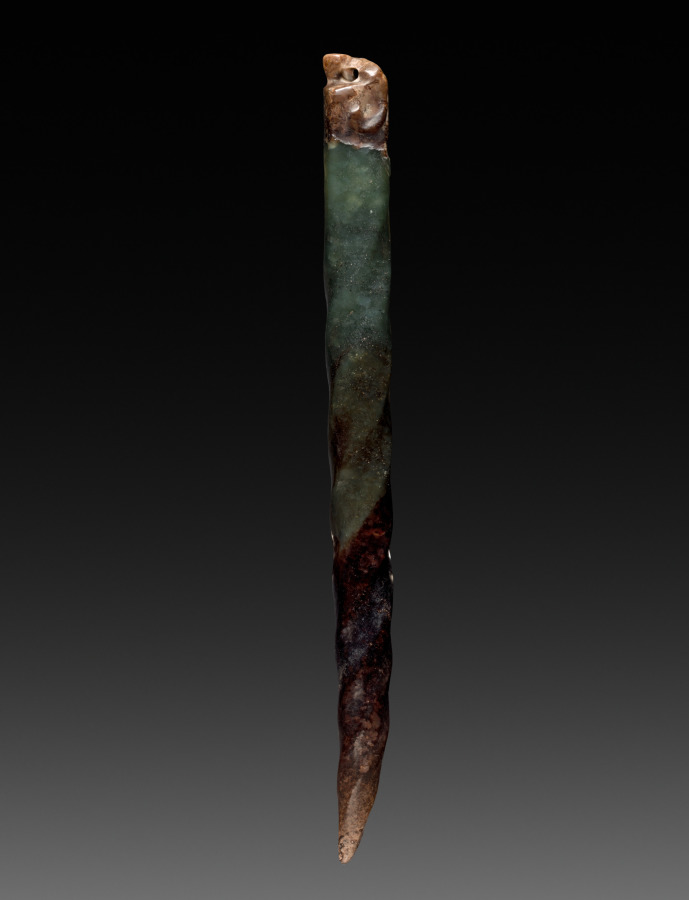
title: Knot Picker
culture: China, Tang dynasty (618-907)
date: 618–907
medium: jade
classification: Jade